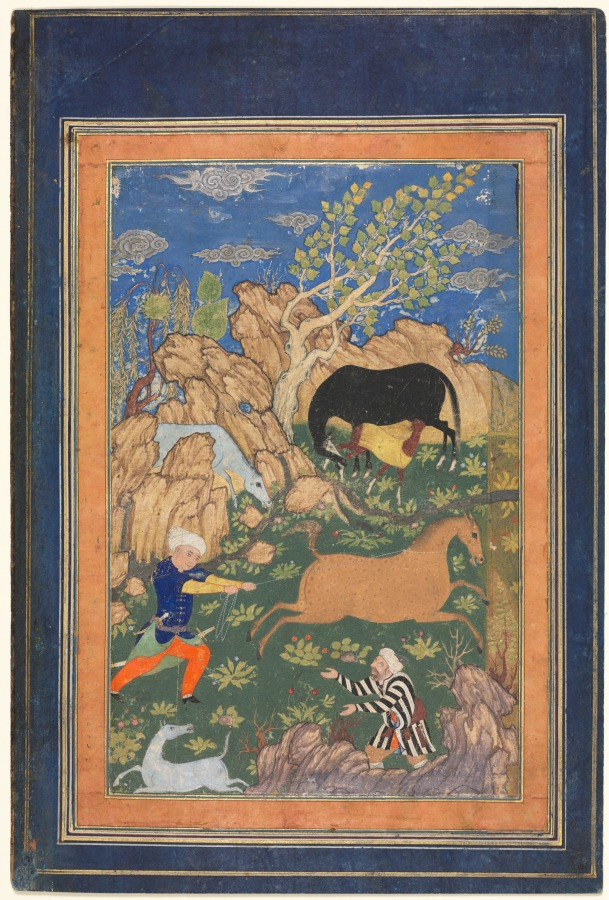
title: Rustam Lassoing his Horse, Rakhsh, in a Landscape (recto); Calligraphy, Persian Verses (verso)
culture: Afghanistan, Herat, Timurid period (1370–1501)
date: late 1500s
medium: opaque watercolor, ink, gold and silver on paper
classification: Manuscript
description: The handsome youth lassoing the feisty colt in this painting is Rustam, the Shahnama's most popular hero. A favorite episode for artists, this event marks a turning point in the fortunes of Iran and offers a wonderful pictorial opportunity. It occurs in a time of trouble for Iran—the throne is empty and a foreign army has invaded the land. The country needs a mighty warrior to fight for her, and the young Rustam is ready for the challenge—once he finds a horse that can bear his enormous weight! The herds are gathered for Rustam's inspection: a piebald bay colt catches his eye. For three years no one has been able to capture the colt, known as "Rustam's Rakhsh." Rustam asks what price the herdsman wants for him. The reply: "If you are a true Rustam—a true 'deliverer'—mount him and make the land of Iran aright. The cost of Rakhsh is the soil of Iran and the deliverance of the world!"